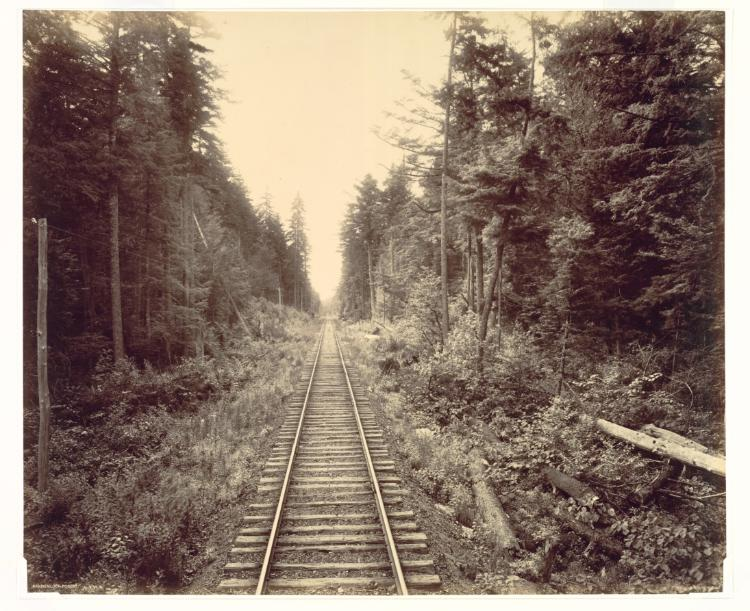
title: Hemlock Forest, Lehigh Valley Railroad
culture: America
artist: William H. Rau (American, 1855–1920)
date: c. 1895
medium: albumen print from wet collodion negative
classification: Photograph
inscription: printed in white at bottom of image; "630 HEMLOCK FOREST LV.R.R." "WILLIAM H. RAU, PHILA"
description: Realizing photography's advertising potential, the Leigh Valley Railroad, in the mid-1890s, commissioned the distinguished, widely traveled commercial and documentary photographer William H. Rau. He recorded a series of scenic views that would be seen while traveling along the new line running between New York and Niagara Falls. Rau utilized mammoth plate and panoramic negatives, developing them in a rail car specially outfitted with a darkroom. In this photograph, one of his most dramatic compositions, the parallel steel rails, positioned slightly off center, slice through a dense, mysterious forest. Ironically, the train line alters the pristine landscape so that a greater number of people can enjoy it.